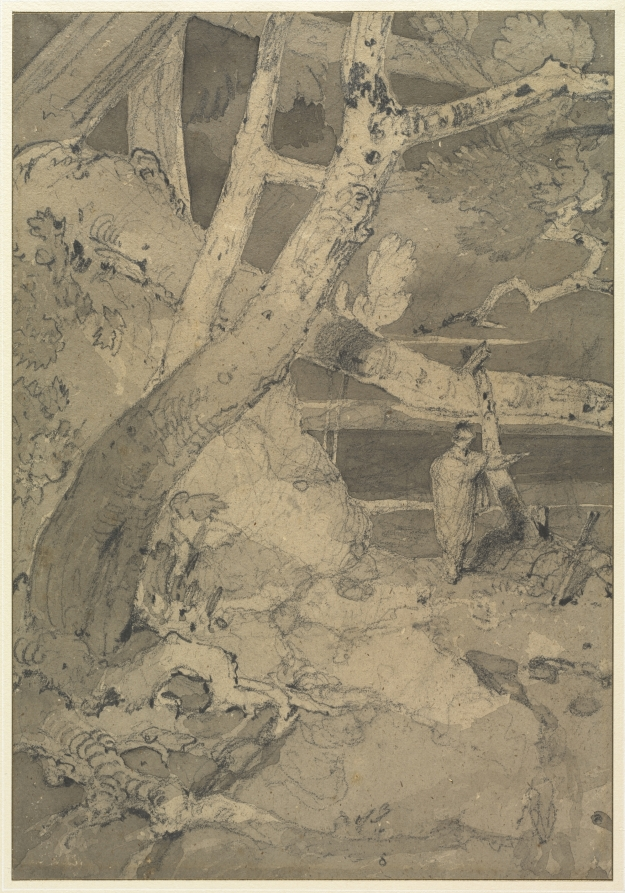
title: Traveler in a Woodland Landscape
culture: England, 19th century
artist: John Sell Cotman (British, 1782–1842)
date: 1806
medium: graphite and gray wash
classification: Drawing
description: John Sell Cotman left his native Norfolk at the young age of 16 and traveled to London with the aspiration to be an artist. His work evolved at a rapid pace as he developed a highly original style remarkable for its simple elegance and schematic treatment of the natural world. This landscape was made soon after a trip to Yorkshire. Cotman largely ignored the noteworthy landmarks of the area, preferring obscure views—trees, crumbling stone walls, and dilapidated fences. Inspired by the Greta woods, the straining bows of the trees form a beautifully balanced structure of geometric and amorphous shapes.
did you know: This drawing is closely related to one in the collection of the Norwich Castle Museum, in which a similarly abstracted figure retreats beneath embowering trees twisted in fantastic shapes.